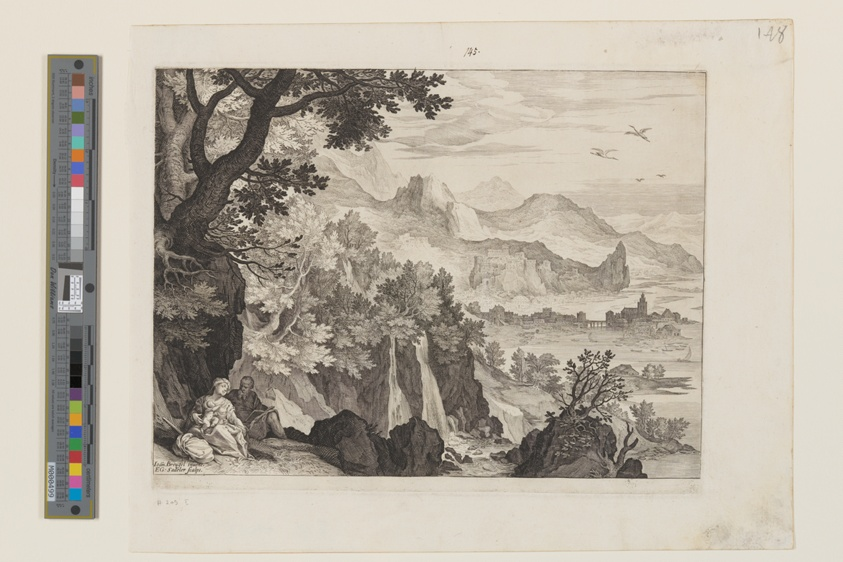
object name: Print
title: Mountainous Landscape with The Rest on the Flight into Egypt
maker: Aegidius Sadeler II (Flemish, c. 1570–1629); after Jan Brueghel the Elder (Flemish, 1568–1625)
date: c. 1590-1620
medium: Engraving on ivory laid paper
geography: Flanders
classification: print; paper; prints and drawing; engraving